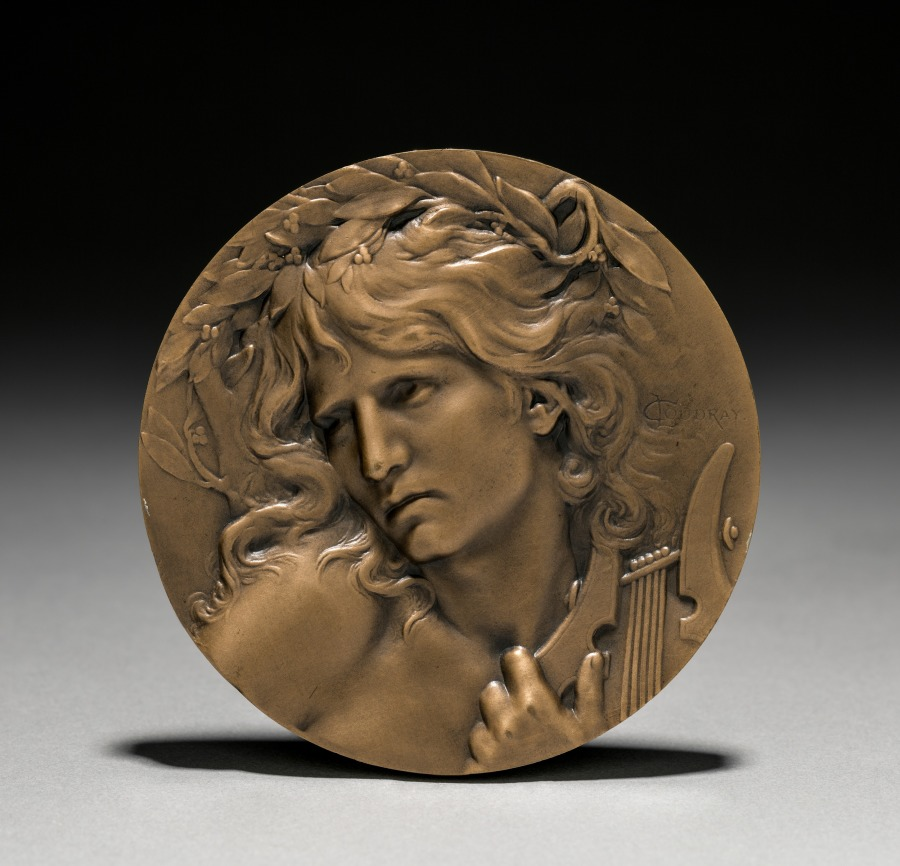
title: Medal Presented to Loïe Fuller by the French Government: Orpheus at the Entrance to the Underworld (obverse)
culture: France, 19th century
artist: Marie Alexandre Lucien Coudray (French, 1864–1932)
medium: bronze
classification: Metalwork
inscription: on obverse: L. Coudray. Inscribed on edge: "Bronze" with an unidentified emblem.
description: A temporary theater on the grounds of the 1900 Exposition Universelle was devoted to Loïe Fuller, who by that time had become a cultural icon. The theater’s interior was hung with draperies onto which a kaleidoscope of colors shone from stained glass windows and hidden lamps, evoking the diaphanous veils of her costumes. In the foyer was a gallery of paintings, drawings, and sculpture all depicting the dancer. Coudray’s medal, Orpheus at the Entrance to the Underworld, was struck to commemorate the world’s fair. This example of the famous Art Nouveau medal was engraved as a gift to Loïe Fuller.